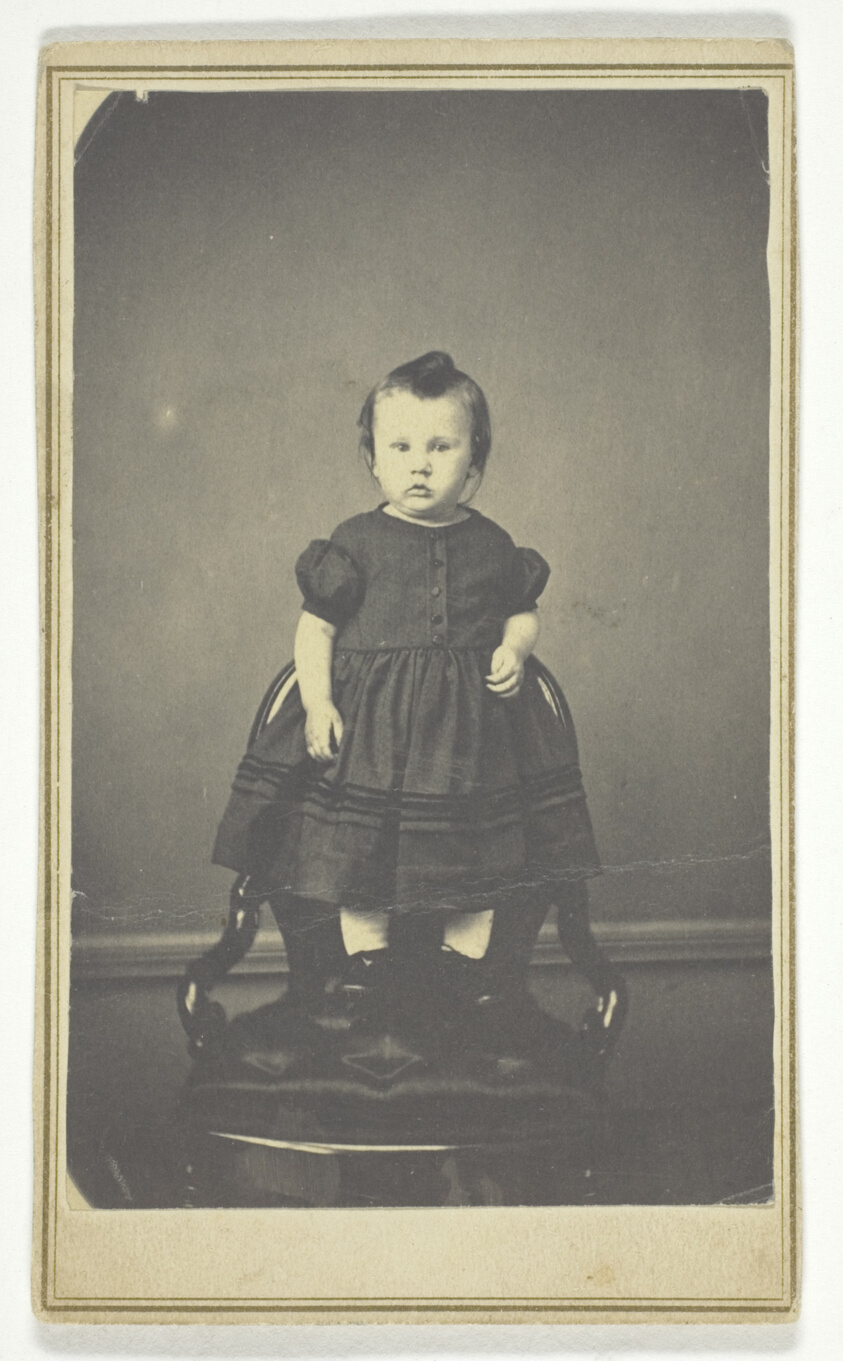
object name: Photograph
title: Untitled (Portrait of Seated Girl)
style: 19th century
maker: Artist unknown; 19th century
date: 1850/99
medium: Albumen print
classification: photography; photograph